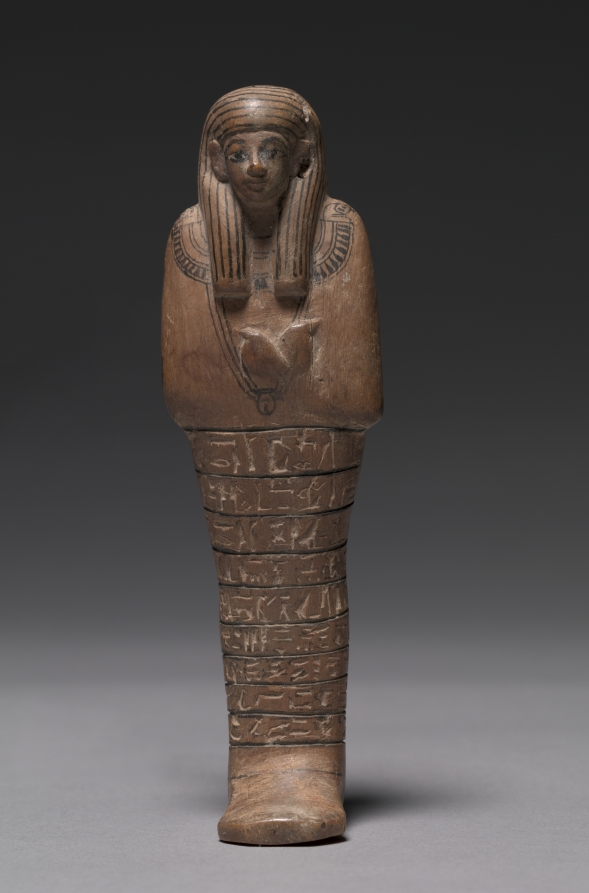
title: Shawabty of Tashery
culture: Egypt, New Kingdom (1540–1069 BCE), Dynasty 18, reign of Amenhotep III (1390–1352 BCE)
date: c. 1391–1353 BCE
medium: painted tamarisk?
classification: Funerary Equipment